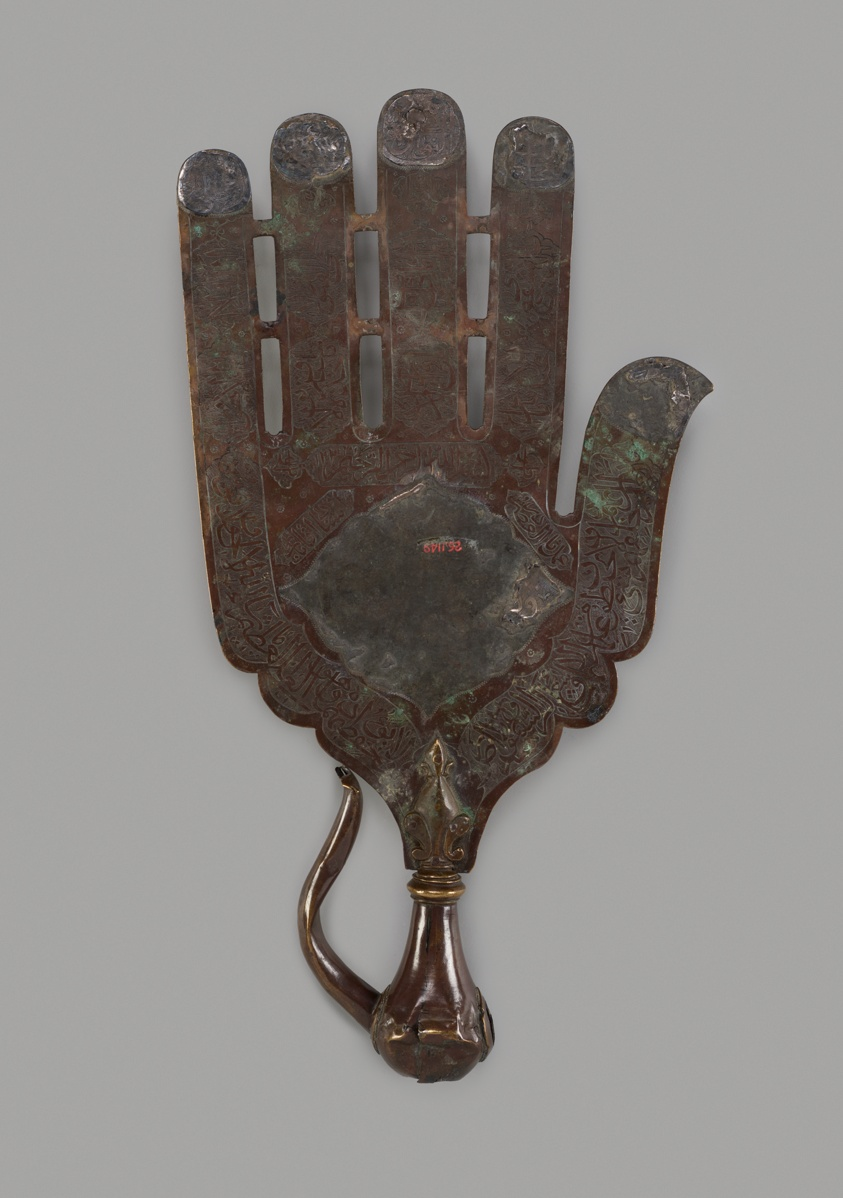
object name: Religious/Ritual Object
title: Khamsa Standard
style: Islamic (culture or style)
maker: Iran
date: Qajar dynasty (1789-1925), c. early 19th century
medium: Brass, with silver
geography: Iran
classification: brass; metalwork; asian art; ritual objects